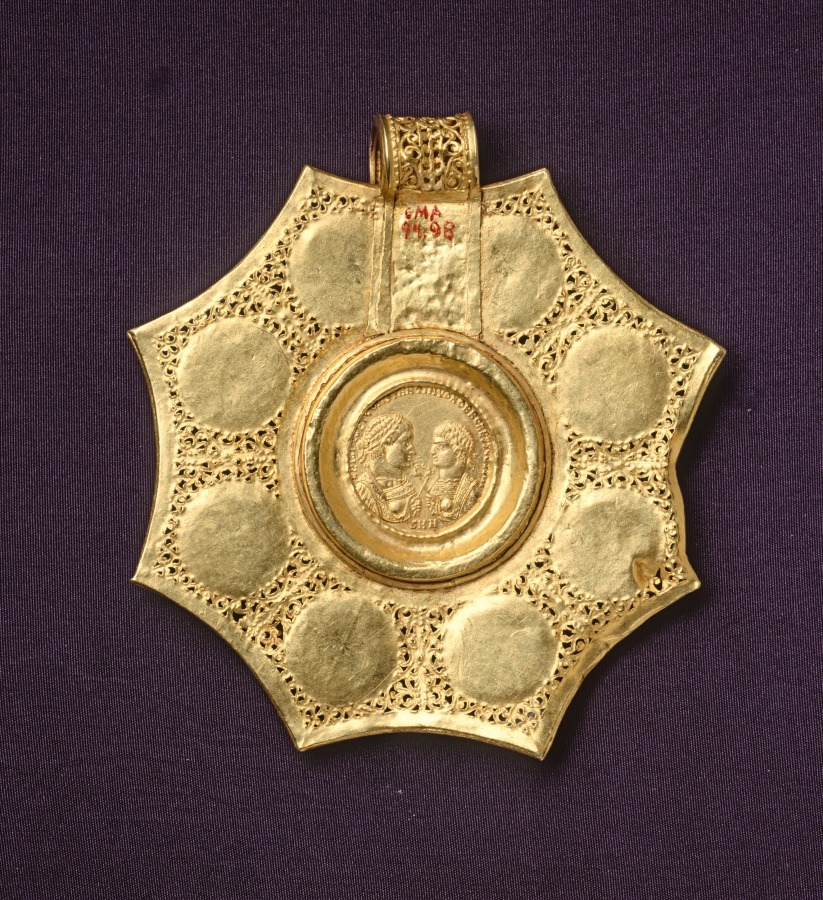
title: Octagonal Pendant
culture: Byzantium, Late Roman, Eastern Mediterranean, (probably Sirium or Nicomedia), Byzantine period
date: 324–26 CE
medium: gold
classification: Jewelry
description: Mounted at the center of this octagonal pendant is a rare coin issued by Constantine the Great, the Roman Empire’s first Christian emperor. Constantine’s portrait appears on the coin’s front, those of two of his sons on the back. Constantine’s image is surrounded by male and female busts, some of which are mythological figures. The pendant once formed the centerpiece of a sumptuous gold necklace, likely a gift for a high-ranking court official or member of the imperial family.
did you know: Precious Byzantine coins, such as the one in this pendant, were mounted as jewelry and bestowed upon court officials as a special honor. They signified loyalty to the emperor and were often passed down as family heirlooms. Does your family have special objects that have been preserved from generation to generation?